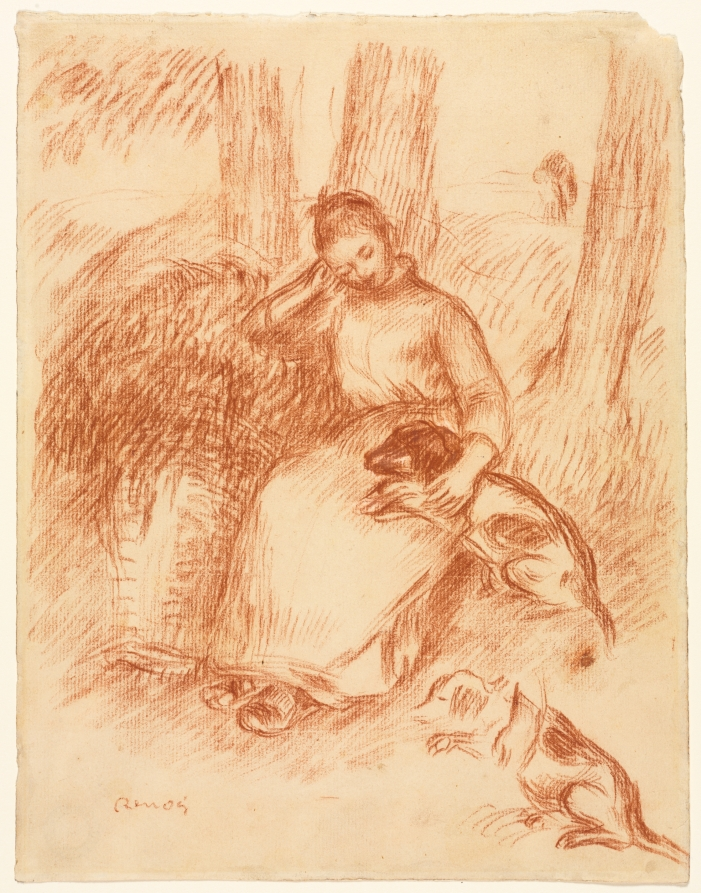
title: Peasant Girl with Dog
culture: France, 19th century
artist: Pierre-Auguste Renoir (French, 1841–1919)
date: c. 1894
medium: red chalk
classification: Drawing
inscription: signed, lower left, in red chalk: Renoir ; verso, upper left, in graphite: 8 ; upper left, in graphite: 41 x 50 ; lower left, on paper strip mounted to sheet, in graphite: 77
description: During the last decades of his career, Renoir worked prolifically in red chalk, which was used to develop a loose and sketchy style. In this drawing, the artist attempted to recapture the spontaneity that characterized Impressionist art a few decades earlier. By showing a young girl seated resting peacefully alongside a bale of hay, he idealized rural French life.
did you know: The art historian John Rewald supposedly called this work "one of the two or three most beautiful Renoir drawings in America."